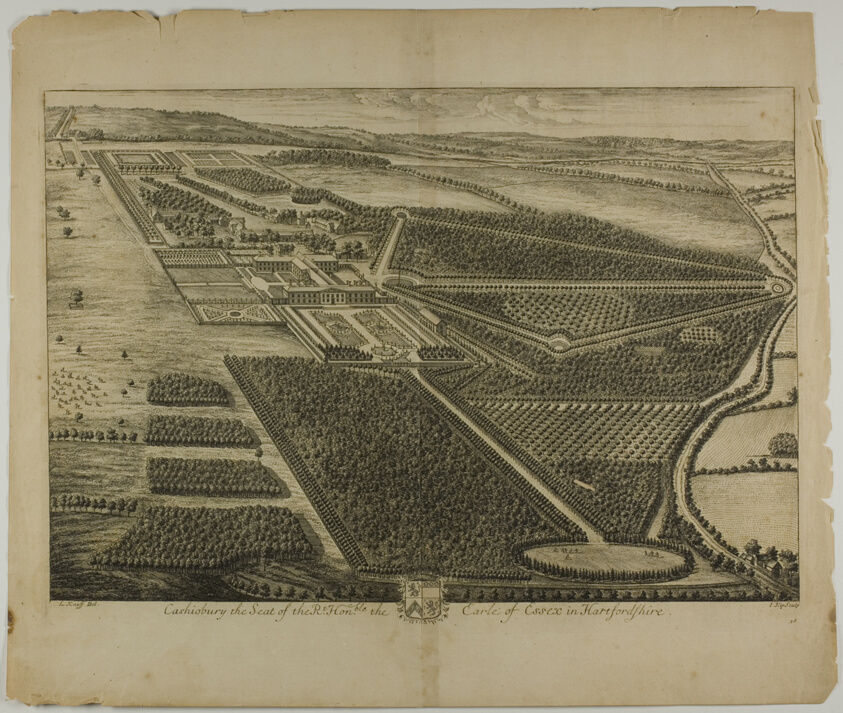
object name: Print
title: Cashiobury, plate 28 from Britannia Illustrata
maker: Jan Kip (Dutch, c. 1653-1722); after Leonard Knyff (Dutch, 1650-1721); published by David Mortier (French, 1673-1728)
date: published 1707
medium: Etching, with engraving, in black on cream laid paper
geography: Netherlands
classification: prints and drawing; engraving; etching; print